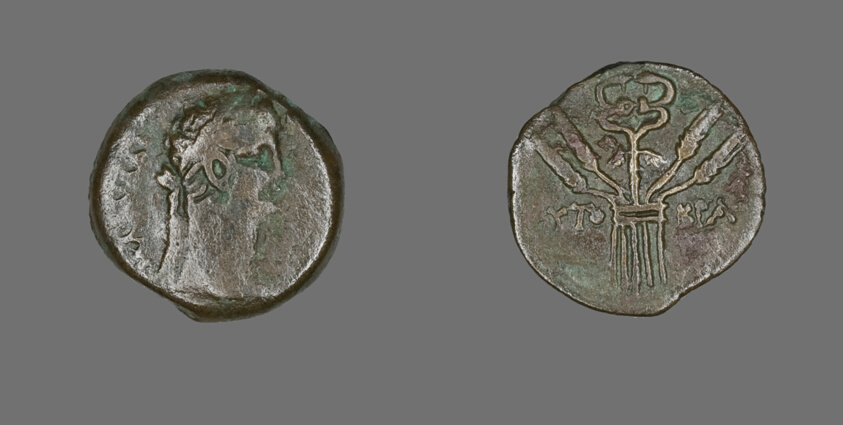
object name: Coin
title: Coin Portraying Emperor Claudius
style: roman period (egyptian), greco-roman (egyptian)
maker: Roman, minted in Alexandria, Egypt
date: 41-54 (probably minted about 49-50)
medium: Bronze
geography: Egypt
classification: coin; ancient art